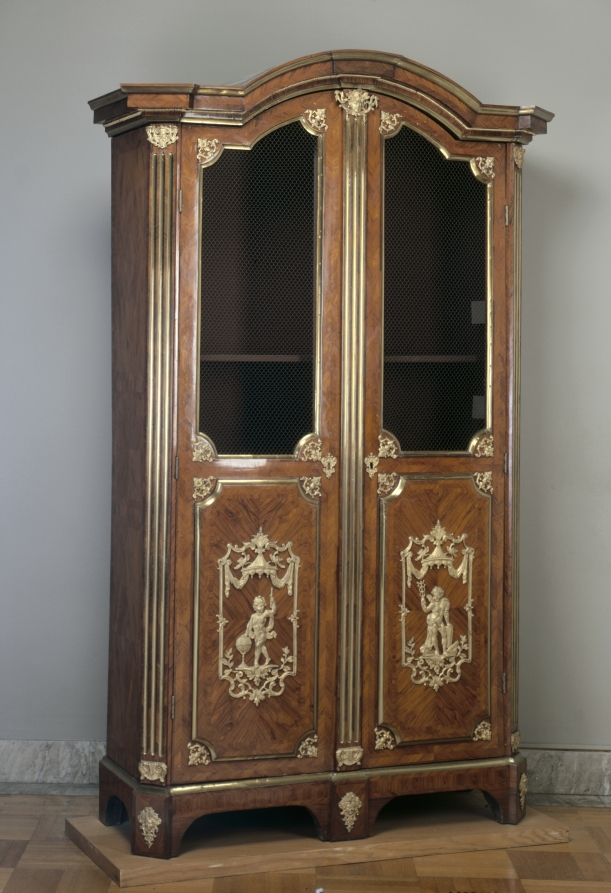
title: Bookcase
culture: France, 18th century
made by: attributed to Charles Cressent (French, 1685–1768)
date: c. 1720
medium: Kingwood and rosewood veneers, gilt metal mounts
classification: Furniture and woodwork